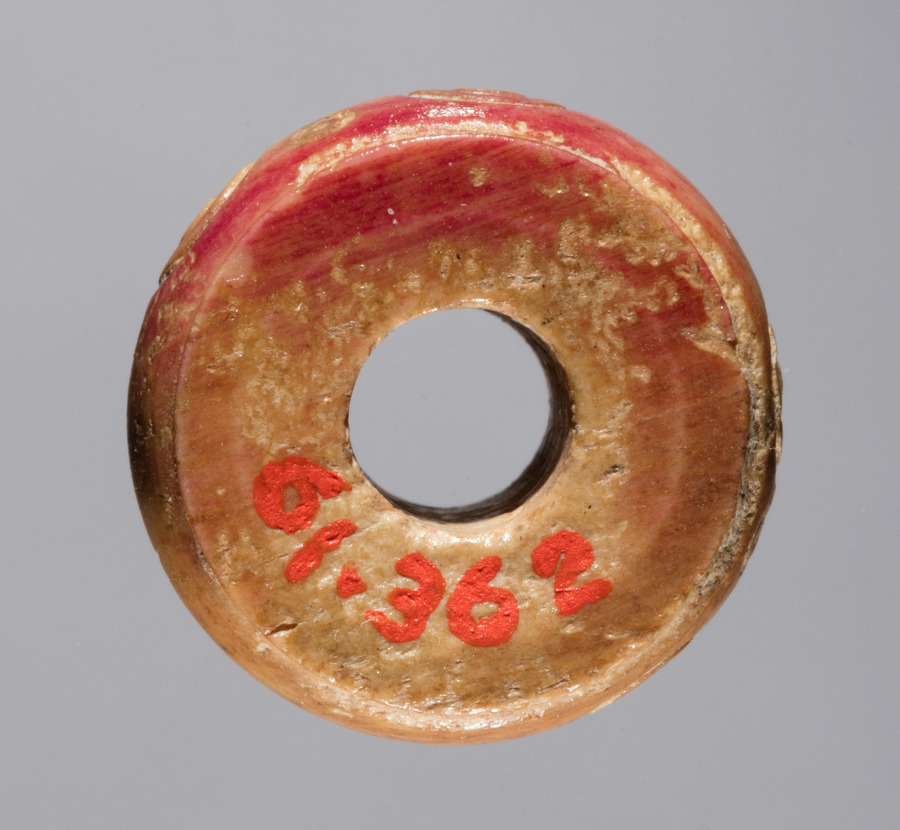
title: Spindle Whorl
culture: Iran, early Islamic period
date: 700s - 900s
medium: bone, incised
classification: Spindle Whorl